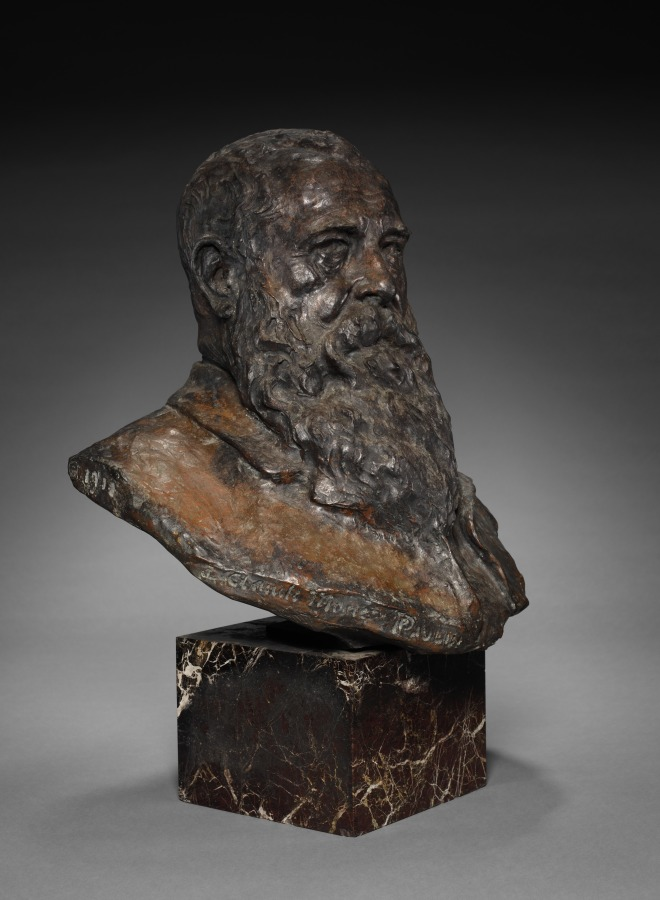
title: Claude Monet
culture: France, 20th century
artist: Paul Paulin (French, 1852–1937)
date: late 1800s-early 1900s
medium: bronze, marble base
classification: Sculpture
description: Paul Paulin was a renowned Parisian dentist who had a passion for sculpting and was encouraged by Edgar Degas to pursue an artistic career. Paulin is best known for his portrait busts of notable Impressionists. There are related versions of this portrait bust of the celebrated painter Claude Monet at three museums in Paris: the Petit Palais (plaster), the Musée d'Orsay (bronze), and the Musée Rodin (bronze).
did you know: In addition to Claude Monet, Paul Paulin also made portrait busts of Edgar Degas, August Renoir, Camille Pissarro, and Auguste Rodin.